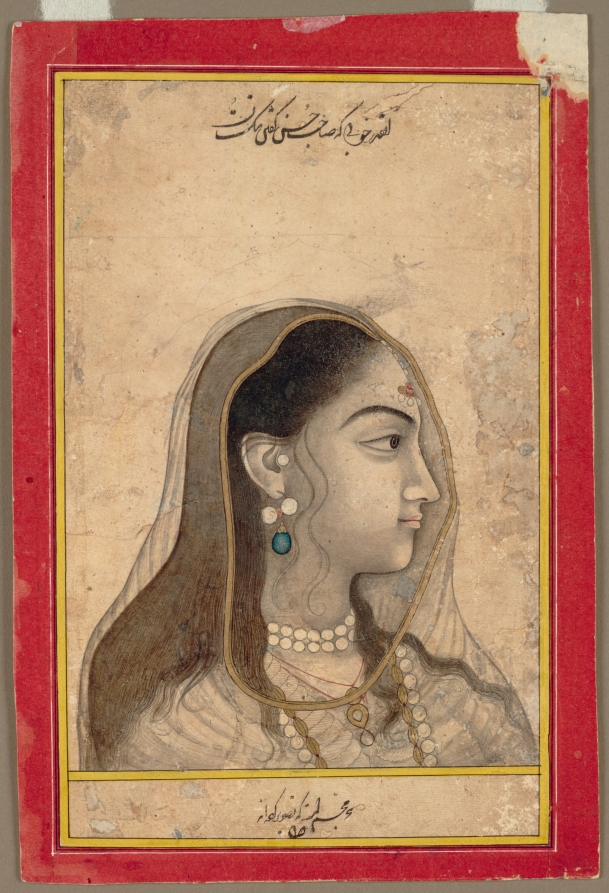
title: Head of a Beauty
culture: India, Mughal school, 18th century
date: c. 1750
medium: Gum tempera, ink, and gold on paper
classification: Painting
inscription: recto, upper center, in Persian: So exquisite that to call you beautiful would be a travesty of the word; it is magic personified that has been exhibited in this painting. Bottom center in Persian: Picture of a beauty.